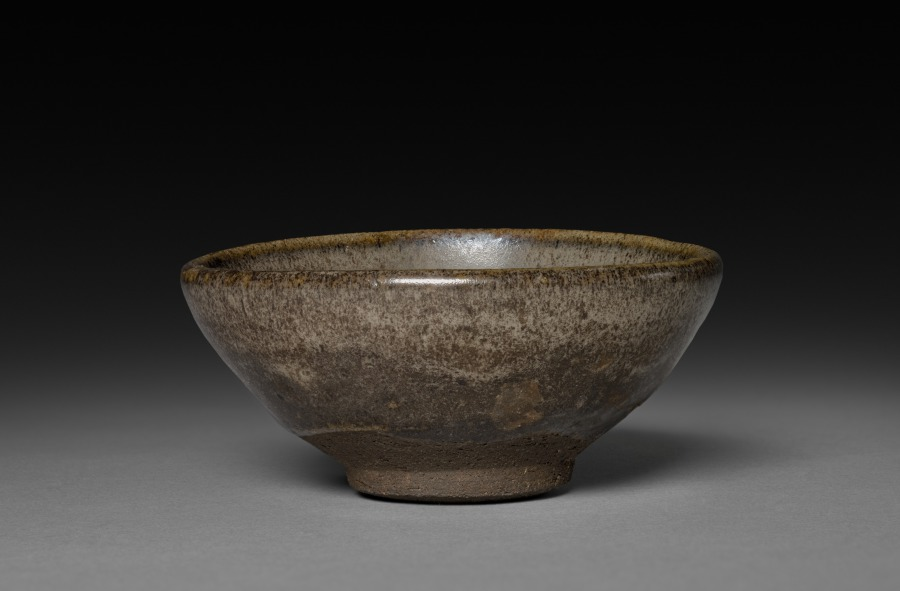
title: Tea Bowl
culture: China, Fujian province, Song dynasty (960-1279)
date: 960–1279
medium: stoneware, Jian ware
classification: Ceramic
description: This brownish-black stoneware tea bowl has rounded sides. Its mottled and blurred green-gray and brown glaze stop short of the foot.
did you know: Jian ware was very popular with the tea cultures in China and Japan.